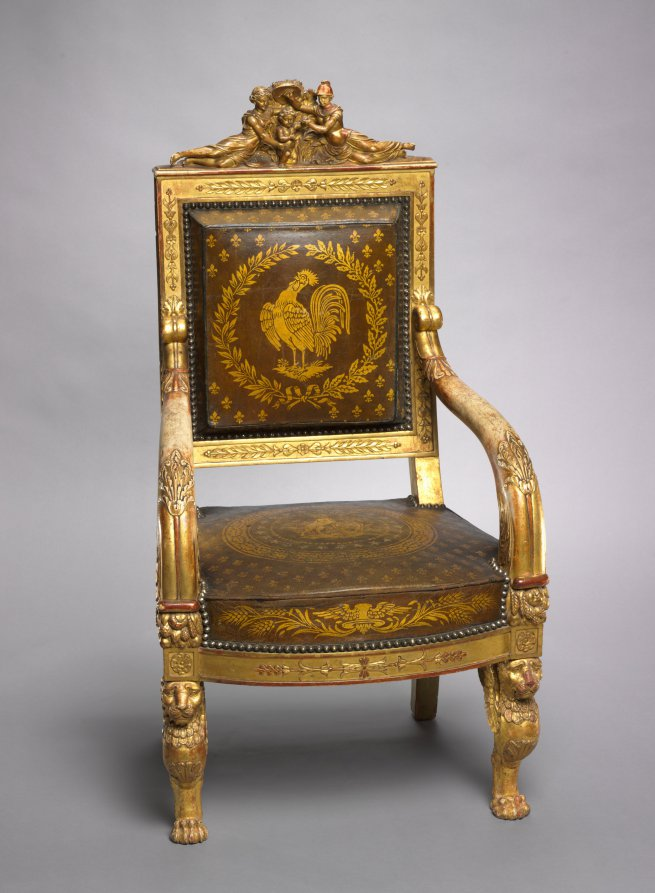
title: Child's Throne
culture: France, Paris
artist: Pierre-Marie Balny le Jeune (French, 1832)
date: 1822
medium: carved and gilded wood, leather upholstery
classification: Furniture and woodwork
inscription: inscribed with stencils inside back rail: BLONDEL TAPISSIER/RUE ST. ANTOINE N 72 1822 inscribed in ink lower edge back rail: 12 JANVIER 18[22?]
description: This chair was made for the young, presumed successor to the French throne who ruled briefly as Henri V in 1830, the last of the direct Bourbon line. He is depicted at the center of the top rail protected by female figures representing France and Minerva, the Roman goddess of wisdom. Fleurs-de-lis and the Gallic rooster, symbols of French royalty and the French people, decorate the upholstery.